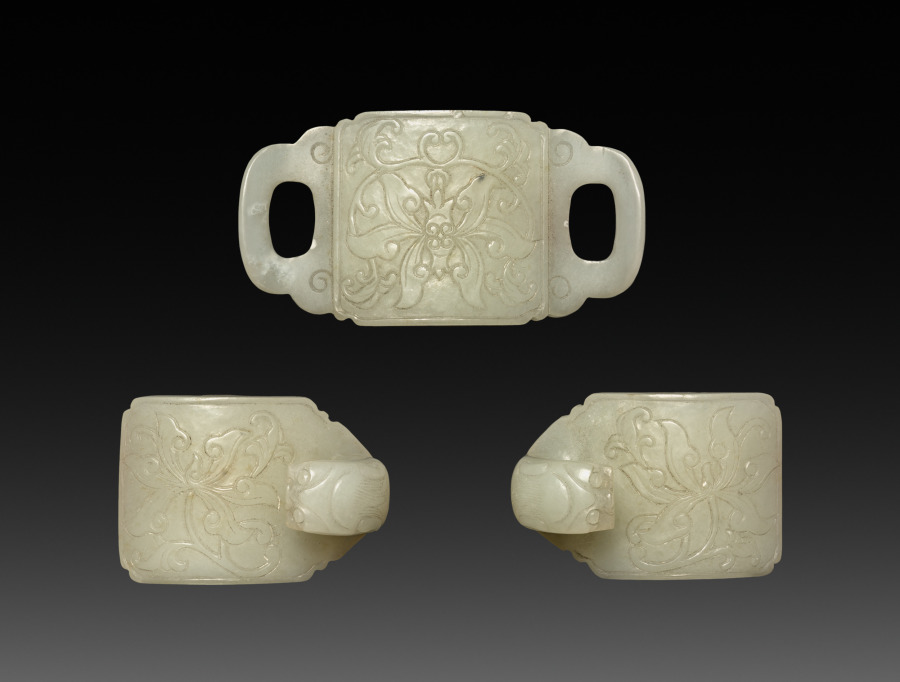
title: Buckle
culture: China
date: 1800s–1900s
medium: white jade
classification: Jewelry